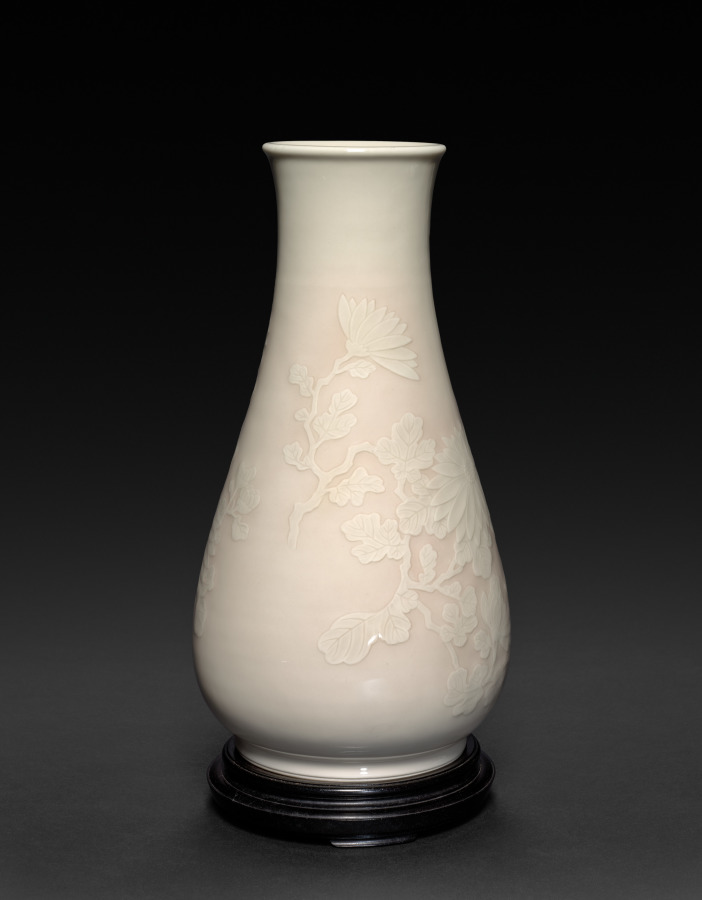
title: Flower Vase with Chrysanthemums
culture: Japan, Meiji period (1868–1912)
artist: Seifū Yohei IV (Japanese, 1872–1951)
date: 1914–46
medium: Porcelain with molded and carved design, underglaze pink, and cream glaze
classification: Ceramic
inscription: 清風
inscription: 清風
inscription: 清風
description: In creating this kanpakuji (or "bright-jewel white porcelain") vase, Yohei IV has applied his father’s signature creamy translucent glaze in combination with underglaze pink gradation surrounding motifs in low relief over an ivory clay body. This method was used to achieve the creamy white of the stalks, leaves, buds, and flowers of the elaborate design of chrysanthemum flowers in diverse stages of bloom.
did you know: The ivory and pink vase by Yohei IV show his father’s “bright-jewel white porcelain” technique.